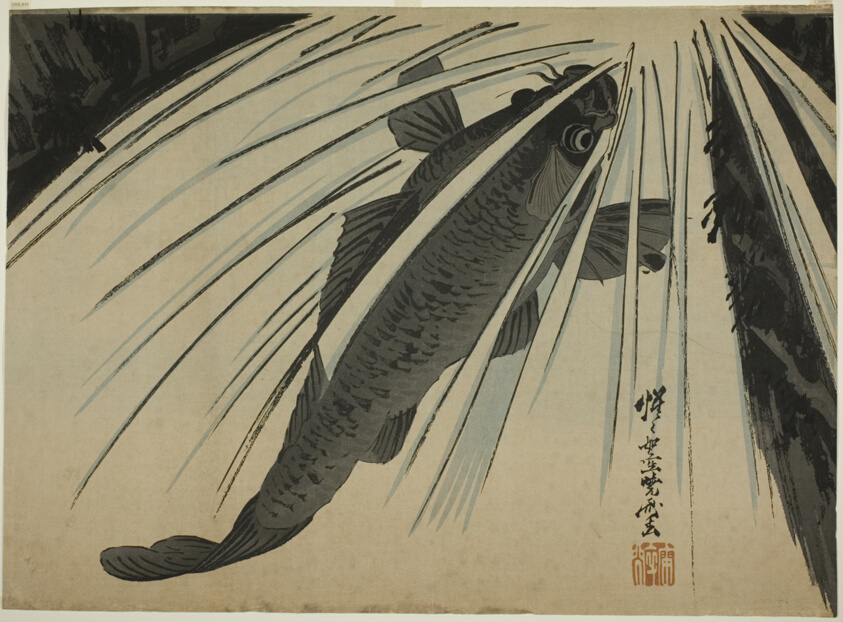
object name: Print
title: Carp Ascending Falls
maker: Kawanabe Kyosai; Japanese, 1831-1889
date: late 19th century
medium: Color woodblock print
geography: Japan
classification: print; asian art